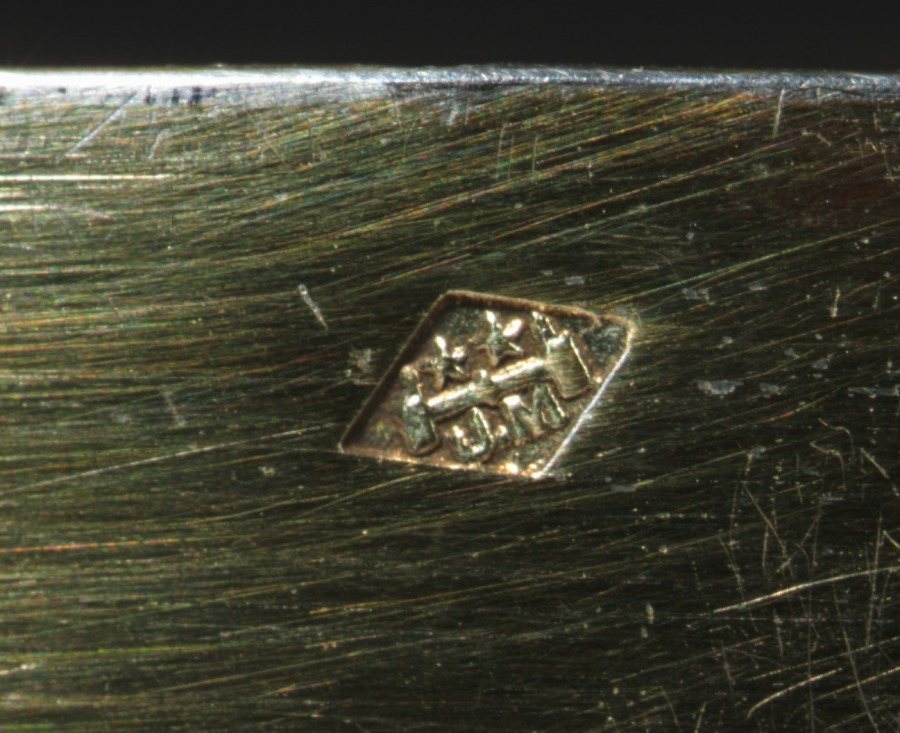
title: Monkey Figure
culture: Denmark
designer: Ingeborg Plockross-Iminger (Danish, 1872–1962)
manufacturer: Bing & Grøndahl (Danish, est. 1853)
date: c. 1900–1925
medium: porcelain, silver-gilt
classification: Sculpture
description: This figure featuring three monkeys was designed by the Danish ceramist Ingeborg Plockross-Iminger. The figure is displayed with a French silver mount that references Japonisme and Art Nouveau styles that were popular at the end of the 1800s and experienced a resurgence in the 1920s because of increased importation of Japanese goods to the West.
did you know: This ceramic figure usually stands alone, without a silver mounting.